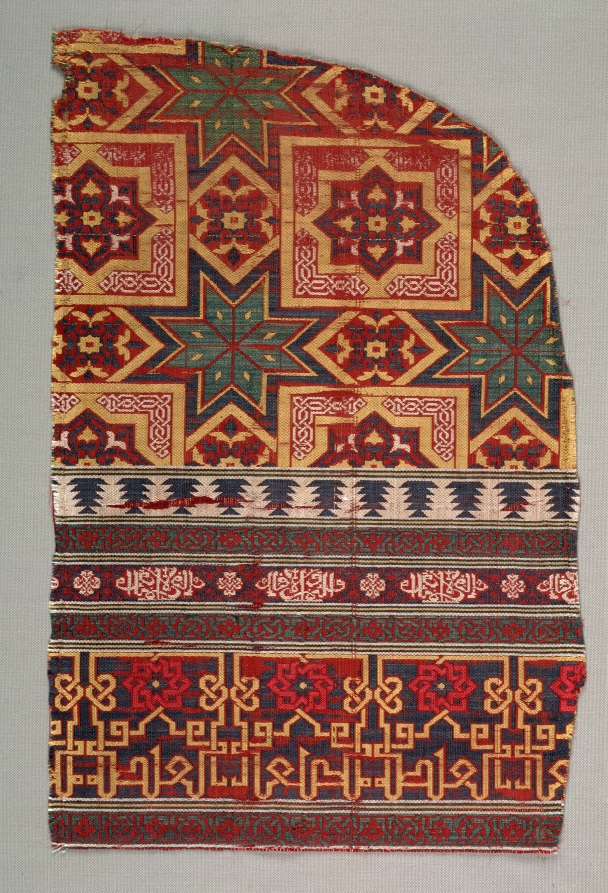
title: Alhambra hanging fragment with decorated bands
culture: Spain, Granada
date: 1300s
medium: Silk: lampas and taqueté weave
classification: Textile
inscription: the principal field of geometric laceria forming stars and squares is bordered by a broad composite band (incomplete) consisting of central wide band with knotted Kufic inscription ("beatitude"), framed by narrower bands with knotwork, Naskhi inscriptions ("success and prosperity") in cartouches and crenallations.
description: The ability to harmoniously combine intricate designs and varied colors was one of the unparalleled achievements of Islamic art. This silk curtain fragment reveals juxtapositions of large- and small-scaled patterns, woven with bold contrasting colors in bands of varying widths. Segments of Arabic text have been woven into the design. The repeated phrase good fortune and prosperity is woven in ivory silk in one of the narrow bands. In the wide band at the bottom, Kufic script in yellow silk extends the word beatitude.